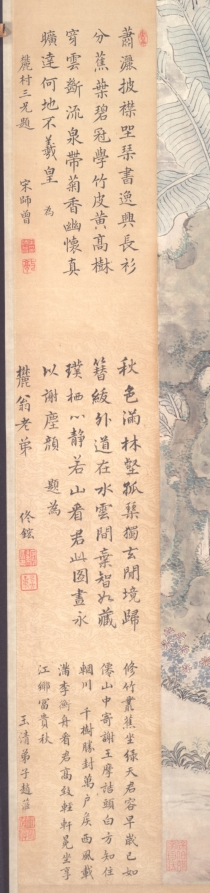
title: Portrait of An Qi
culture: China, Qing dynasty (1644-1911)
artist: Wang Hui (Chinese, 1632–1717)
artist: Tu Luo (Chinese, active c. 1715)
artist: Yang Jin (Chinese, 1644–1728)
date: 1715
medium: hanging scroll; ink and color on paper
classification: Painting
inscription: [印]上下千年. 麓村高逸：康煕乙未季春，廣陵涂洛寫照，海虞楊晉布景，八十四叟王翬補竹石。[印]耕煙; 王翬之印.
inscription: 俯視塵寰逸韻高，襟懷潚灑興偏豪。/ 琴書座右親風雅，竹石池邊拭羽毛。/ 蕉葉亂雲遮北礀，鶴翎凝雪戀東皋。/ 翩翩度量如君少，靜對秋江萬斛濤。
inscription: 知君頗好道，作意洗緐縟。/ 遂窮林亭勝，翛然契幽獨。/ 自得會忘言，餘善時往復。/ 岸幘若有期，把卷一停讀。/ 鶴馴行載正，雲閑斷還續。/ 橘柚欎寒煙，芭蕉瀉深綠。/ 石橋逕屢迴，暗水流亦曲。/ 真心恣奇探，曠景縱遐矚。/ 陶謝不可作，此旨更誰屬。/ 眷焉展斯圖，令我怡心目。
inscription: 逸興迥絶塵，風流仰高躅。/ 側無鹿角巾，横呈豹皮褥。/ 胸藏山壑富，座列琴囊足。/ 橙懸萬顆黄，蕉散一叢綠。/ 泉清鶴景長，樹遠雲光續。/ 披圖識性情，伊人温似玉。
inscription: 風雅出塵寰，披圖見一斑。/ 橘香新雨後，竹影夕陽間。/ 流水鳴前澗，歸雲渡遠山。/ 幽棲如可遂，應許共追攀。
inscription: 蕭灑披襟坐，琴書逸興長。/ 衫分蕉葉碧，冠學竹皮黄。/ 高樹穿雲斷，流泉帶菊香。/ 幽懷真曠達，何地不羲皇。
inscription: 秋色滿林壑，孤琴獨玄閒。/ 境歸簪紱外，道在水雲間。/ 棄智如藏璞，栖心静若山。/ 看君此圖畫，永以謝塵顏。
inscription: 修竹叢蕉坐綠天，君容早歳已如仙。/ 山中寄謝王摩詰，頭白方知住輞川。/ 千樹勝封萬戸侯，西風載滿李衡舟。/ 看君高致輕軒冕，坐享江鄉富貴秋。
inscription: 6 seals unidentified.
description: An Qi, the subject of the portrait, was a second-generation salt merchant from Korea. He used part of his wealth to collect art. At the time this painting was commissioned, An was less than 40 years old. He is represented as a Daoist recluse in nature, informally dressed with attributes such as books and a wrapped guqin instrument, a portrait convention for literati-scholars since the Six Dynasties period (220–589 CE). The local Taihu rock, banana plants, and crane suggest a southern garden and a life in seclusion. An’s portrait is evidence of merchants aspiring to the scholar-official class. According to the inscription, this painting was the joint effort of three men, the eldest and most famous was Wang Hui. While the garden setting is homogenous in style, it contrasts with the application of opaque pigments and shading employed for the depiction of An Qi’s face.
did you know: Seven of An Qi's close friends wrote poetic inscriptions on the silk brocade mount around his portrait.